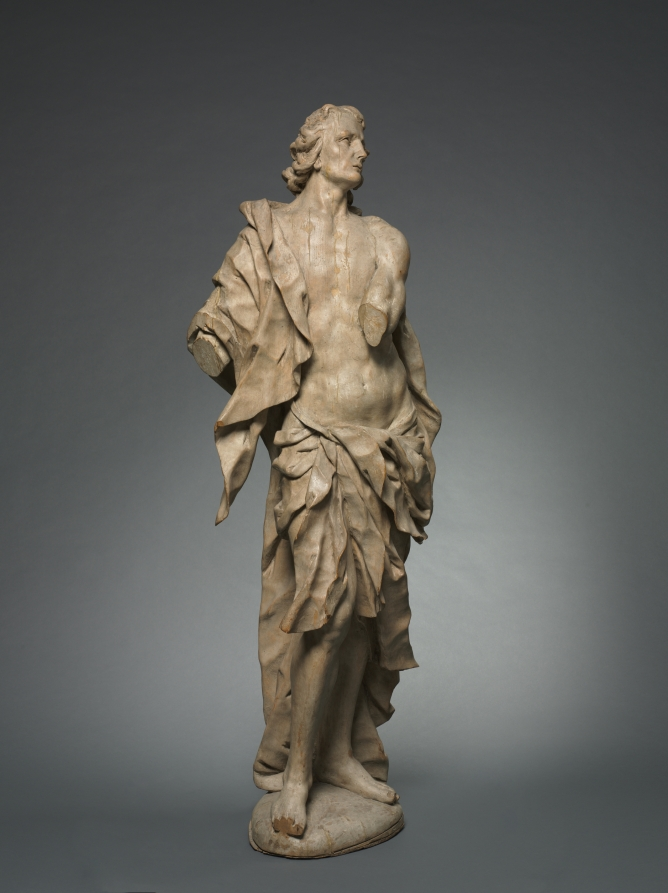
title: A Saint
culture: Germany or Austria, 18th century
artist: follower of Diego Francesco Carlone (Italian, 1674–1750)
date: c. 1730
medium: wood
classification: Sculpture